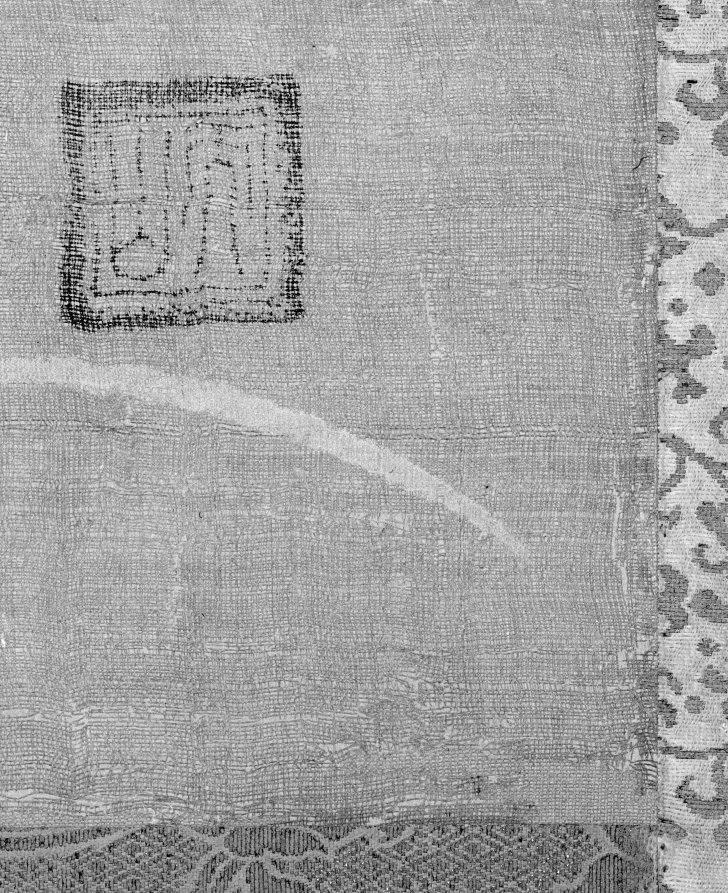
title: Dragon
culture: China, Southern Song dynasty (1127-1279)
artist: Fachang Muqi (Chinese, 1220–1280)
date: c. 1250–79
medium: Hanging scroll; ink on silk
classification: Painting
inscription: 道有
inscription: 雜華室印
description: The dragon and tiger are tied to the philosophical concept of yin and yang, which describes opposite but complementary forces. The dragon occupies a tiered background of waves and mist. Its luminous head emerges from the darker passages, and its narrow twisting body is serpent-like. By contrast, the close-up view of the tiger emphasizes its bulk. The tiger bends its head to lick its paw while its tail curls in the foreground. In their original Chan Buddhist context, this pair of scrolls likely flanked a central image, like the Bodhisattva Guanyin. The silk has darkened over the centuries, and the slight reddish shading in the tiger’s tongue and nose has faded.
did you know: Fachang Muqi was a Chinese Chan Buddhist monk and painter.